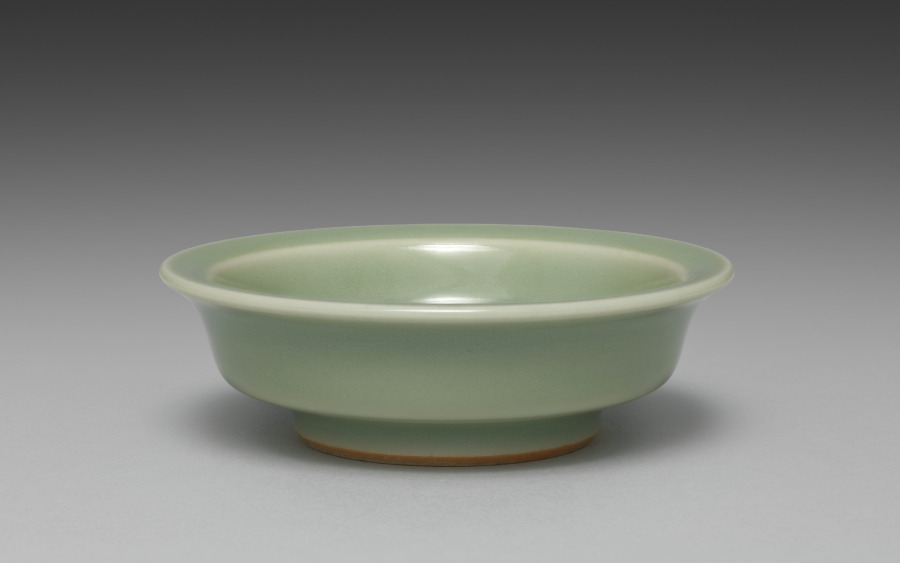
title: Saucer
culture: Japan, Meiji period (1868–1912)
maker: Seifū Yohei III (Japanese, 1851–1914)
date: 1893–1914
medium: One from a set of ten dishes; porcelain with green glaze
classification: Ceramic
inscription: 清風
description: Yohei III’s main output for his sophisticated clientele was in the form of tea sets and dining sets. He created a range of dishes in green glazes. He often produced in pairs, sets of five, or sets of ten. For this set of ten small dishes in a simple, round form that emphasizes the glaze above all, the box lid designates the piece as seiji, or green-glazed porcelain, using a general term for the extensive palette of green glazes often called celadon in English. The box lid further identifies the dishes themselves as tōchō, literally “bean-sized saucers,” a size that makes them suitable for dipping sauces.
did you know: The ten dishes in this set are stored in stacks of five in a two-compartment box.